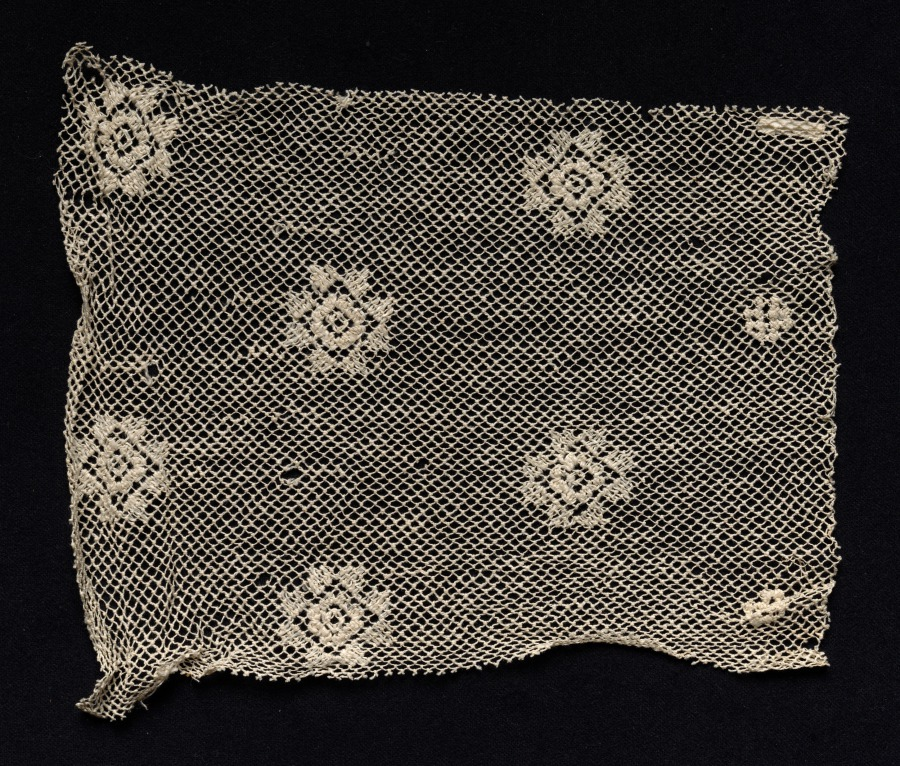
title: Fragment of a Band with Floral Motif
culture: Spain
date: 1700s or early 1800s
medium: Bleached linen (est.): needle lace, filet/lacis (knotted ground and darned in one direction)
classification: Lace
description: Though it is a small fragment, this piece of lace is simple and honest in its decorative quality. The focus is on the abstract floral motif, which stands out with its thick darning against the unadorned diamond ground netting.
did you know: Myrta Leonora Jones, the donor of this work, was a women’s rights activist in Cleveland in the early 20th century.